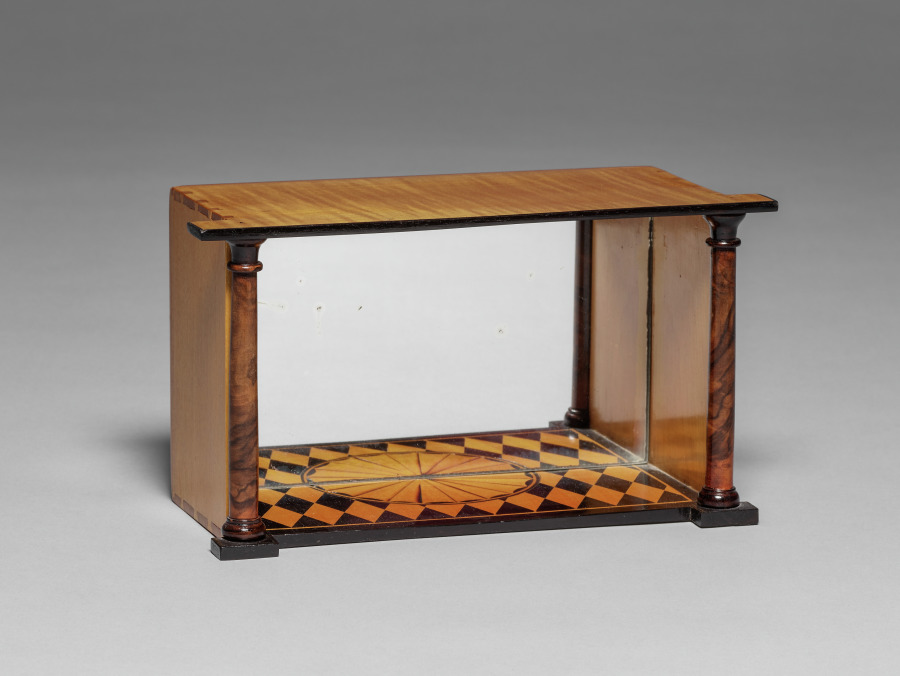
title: Mirrored Partition for a Globe Work Table (Globustisch)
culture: Austria, Vienna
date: c. 1810–15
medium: Burl walnut veneer, mahogany, ebony, satinwood, gilt wood, painted wood; mirrored glass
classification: Furniture and woodwork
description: Work tables resembling globes were the usual form for a lady's sewing or writing table around 1800 in Austria. Combining moving parts, secret compartments, and highly finished decoration, these tables were also a way for the cabinetmaker to show off his skill. The tripod supports and temple-like architectural quality of both the exterior and interior decoration reflect the fashionable taste for neoclassical style, or Biedermeier as it was called in Austria, where Vienna was the center of such elaborate furniture production.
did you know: The top half of the globe rotates upward to reveal hidden compartments for sewing tools, threads, and unfinished fabric pieces.